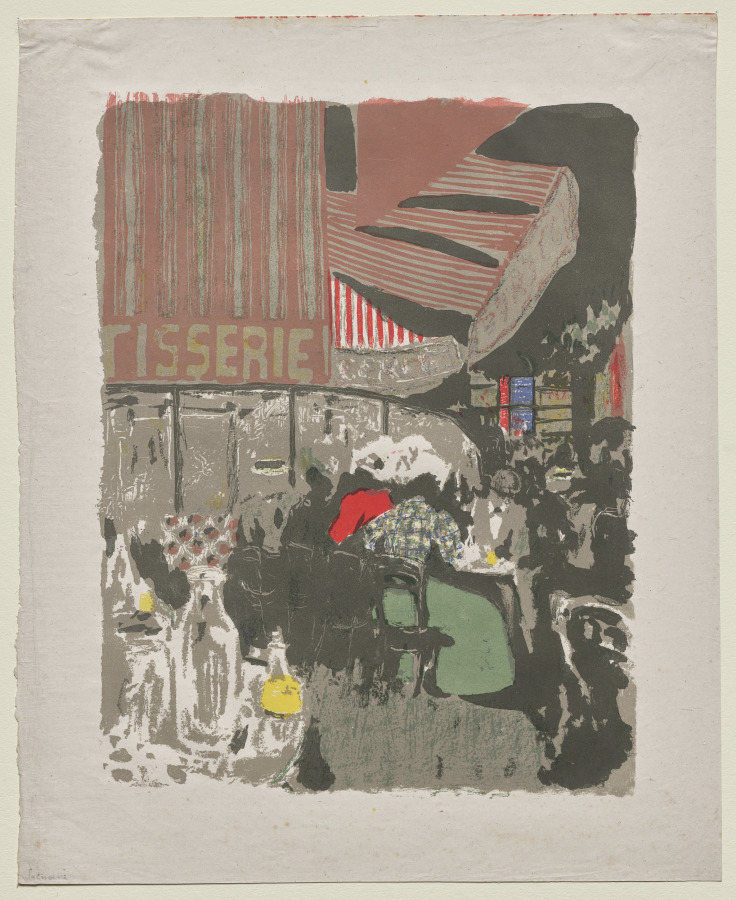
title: The Pastry Shop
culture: France, 19th century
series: Landscapes and Interiors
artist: Édouard Vuillard (French, 1868–1940)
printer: Auguste Clot (French, 1858–1936)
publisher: Ambroise Vollard (French, 1867–1939)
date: 1899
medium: color lithograph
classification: Print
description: Vuillard’s subject of Parisians enjoying refreshments out-of-doors is echoed in his friend Bonnard’s Café Terrace, on view nearby. Both artists treat public settings with the same enveloping closeness of their interiors.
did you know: In 1897, Vuillard purchased a Kodak Brownie that allowed him to take intimate snapshots of family and friends as well as create reference photographs for his paintings and prints.